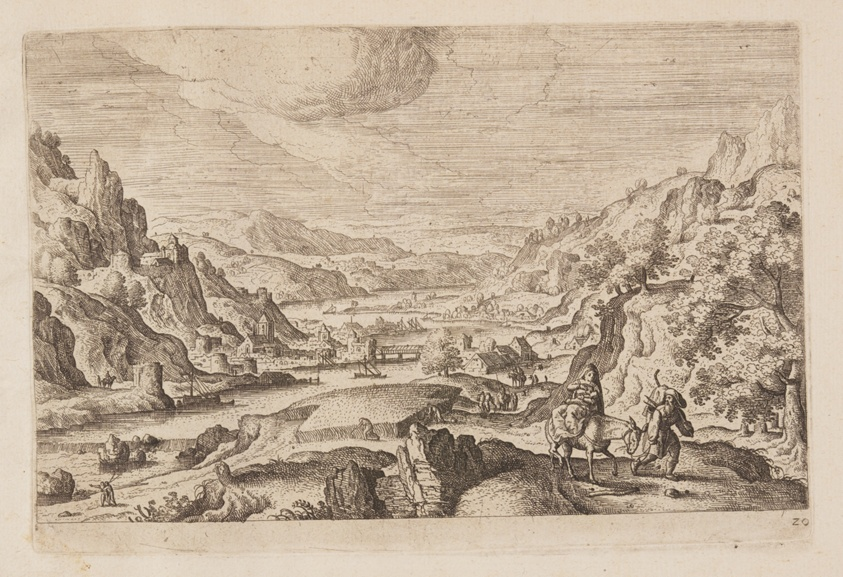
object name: Print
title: Plate 20, from Landscapes with Scenes from the Old and New Testament and Ovid’s Metamorphoses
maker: Hans Bol (Flemish, 1534–1593); published by Philip Galle (Flemish, 1537–1612)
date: 1574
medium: Etching on ivory laid paper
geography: Flanders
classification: print; paper; prints and drawing; etching